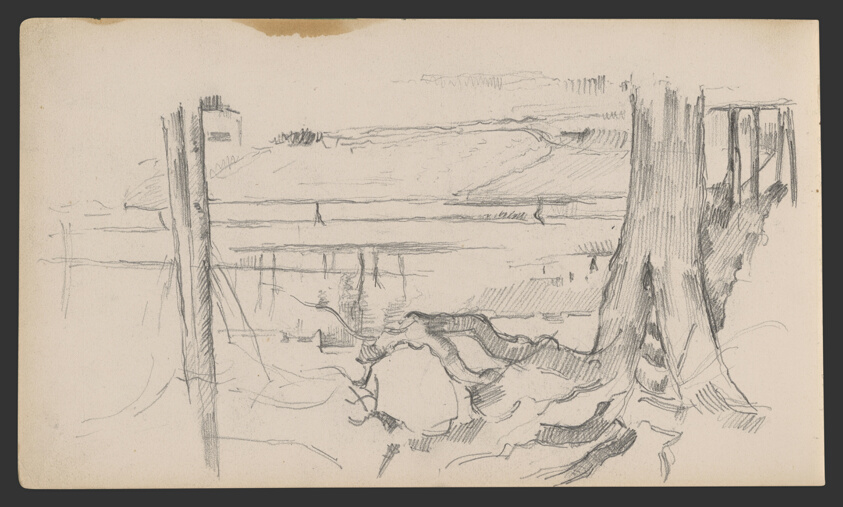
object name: Drawing and Watercolor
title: Sketchbook No. 2 (L'Estaque)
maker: Paul Cézanne; French, 1839-1906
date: 1875–86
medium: Graphite and pen and ink drawings on paper, bound into a book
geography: France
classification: sketchbook; graphite; prints and drawing; paper